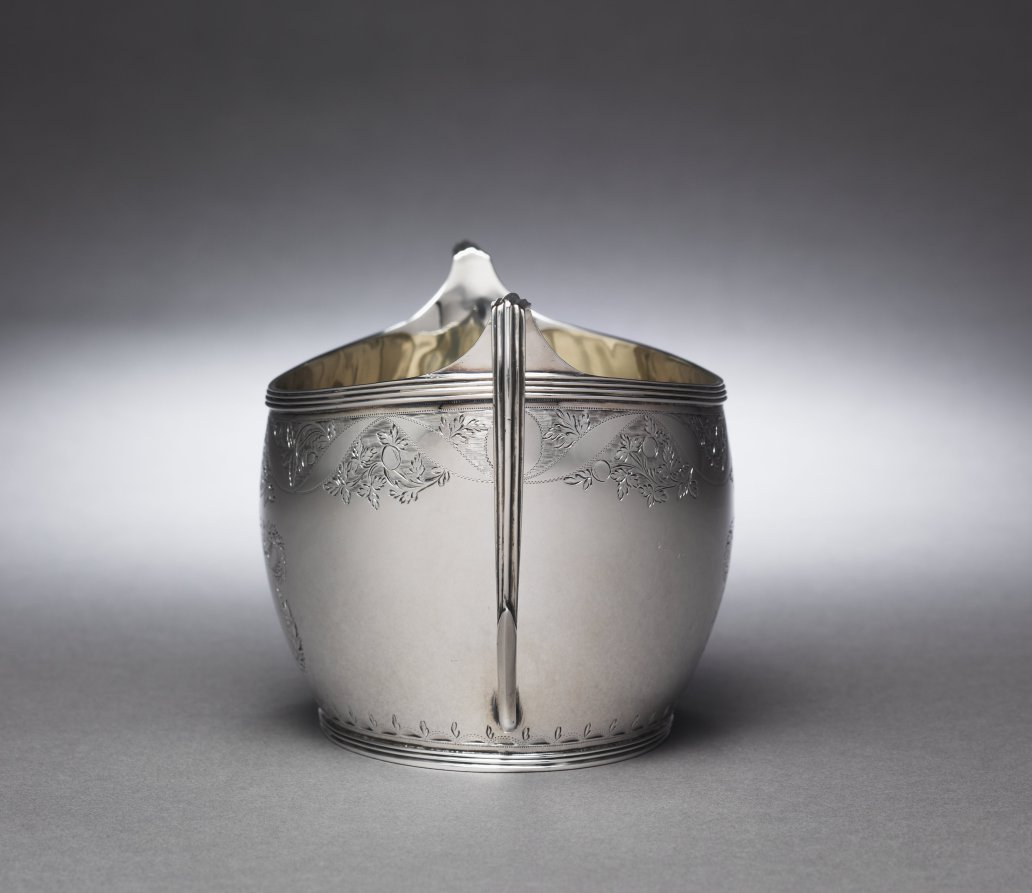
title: Tea Service (Sugar Bowl)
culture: London, England, 19th century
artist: Anne Bateman (British, 1748–1813)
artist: Peter Bateman (British, 1740–1825)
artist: William (I) Bateman (British, 1774–1850)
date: 1807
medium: silver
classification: Silver